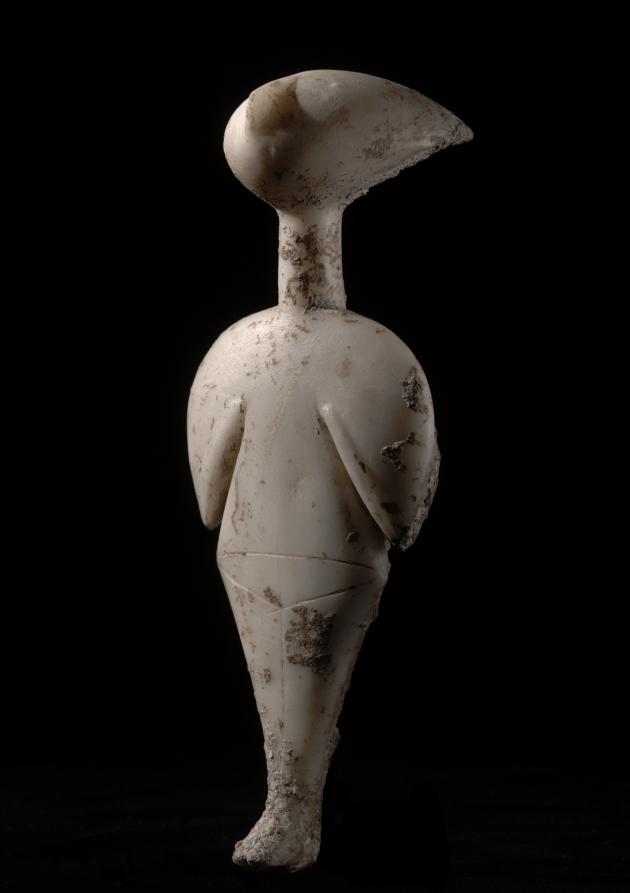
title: Statuette of a Woman: "The Stargazer"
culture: Western Anatolia, early Bronze Age (c. 3300–1200 BCE)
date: c. 3000 BCE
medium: marble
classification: Sculpture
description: "The Stargazer" moniker was given to this diminutive marble sculpture because its upturned head looks toward the heavens. Details carved into the stone are visible while painted features have been lost to time. We do not know how this object was used, but its enigmatic nature invites speculation.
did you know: We can identify this mysterious figure as female by the inscribed pubic triangle below her waist.